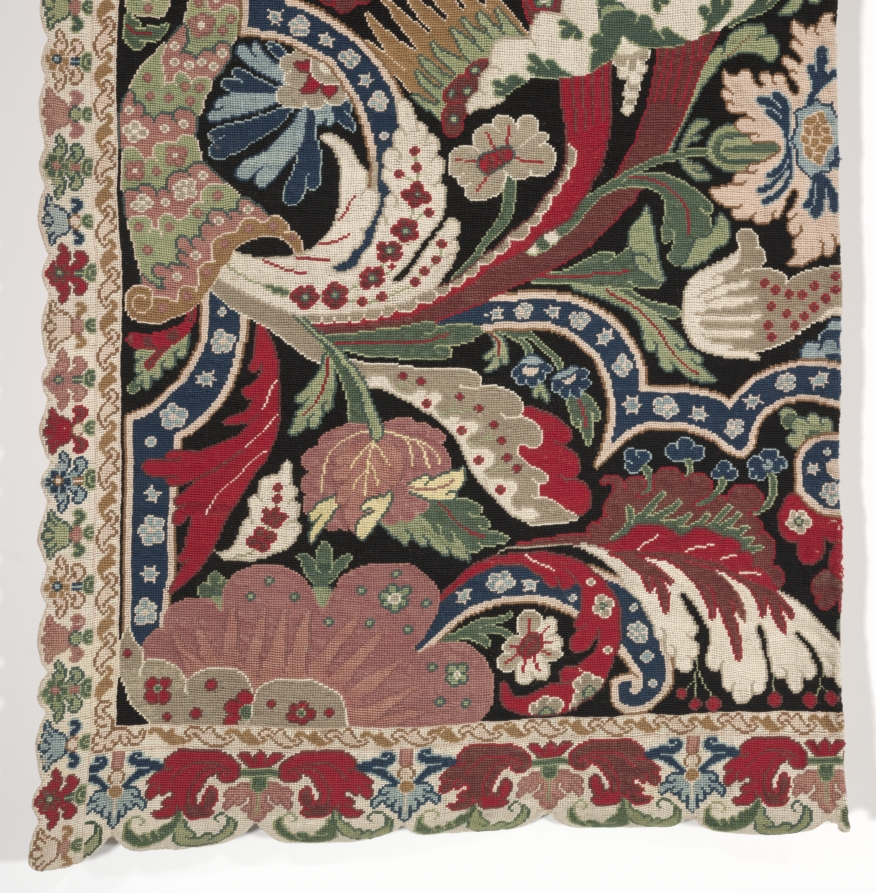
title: Needlework Bed Hanging in the Bizarre style (left half)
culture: France, 18th century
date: 1710–20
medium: Silk, wool; needlework, tent, and cross-stitch embroidery on canvas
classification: Embroidery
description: This panel is one of a pair that would have hung originally around a bed post as part of a full set of hangings on a bedstead in the early 1700s. Elaborate textile hangings were a conspicuous display of wealth since many ladies received their friends within their bedchamber. A full set enveloped the entire bedstead and, when closed, helped retain warmth long after the fire had gone out. This particular pair of panels is remarkable in that they represent many hours of highly skilled needlework. Their design is known as a "bizarre" pattern, which mimicked woven silks of the same era that were asymmetrical, boldly stylized adaptations of Asian fabrics that were coming into the European market from the trading routes at the time.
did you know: The design of this needlework panel is known as a "bizarre" pattern.